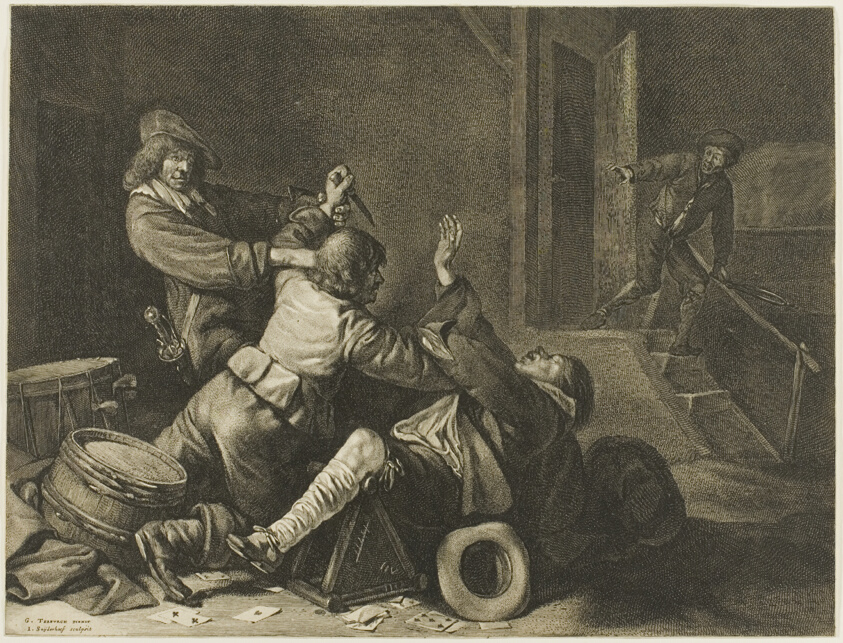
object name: Print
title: Three Men Struggling in an Interior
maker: Jonas Suyderhoef (Dutch, c. 1613-1686); after Gerard ter Borch (Dutch, 1617-1681)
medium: Etching in black on cream laid paper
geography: Netherlands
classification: etching; paper; print; prints and drawing